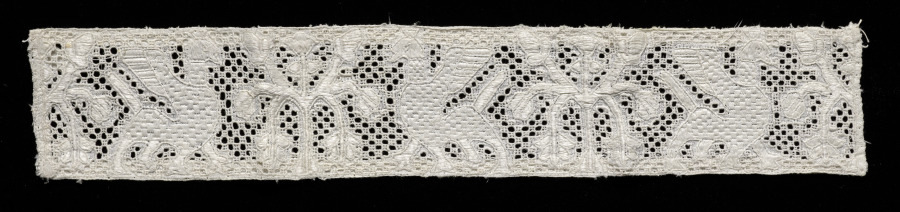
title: Lace Fragment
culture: Denmark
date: 1600s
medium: Linen: Needle lace (cutwork) ground with satin stitch embroidery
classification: Lace